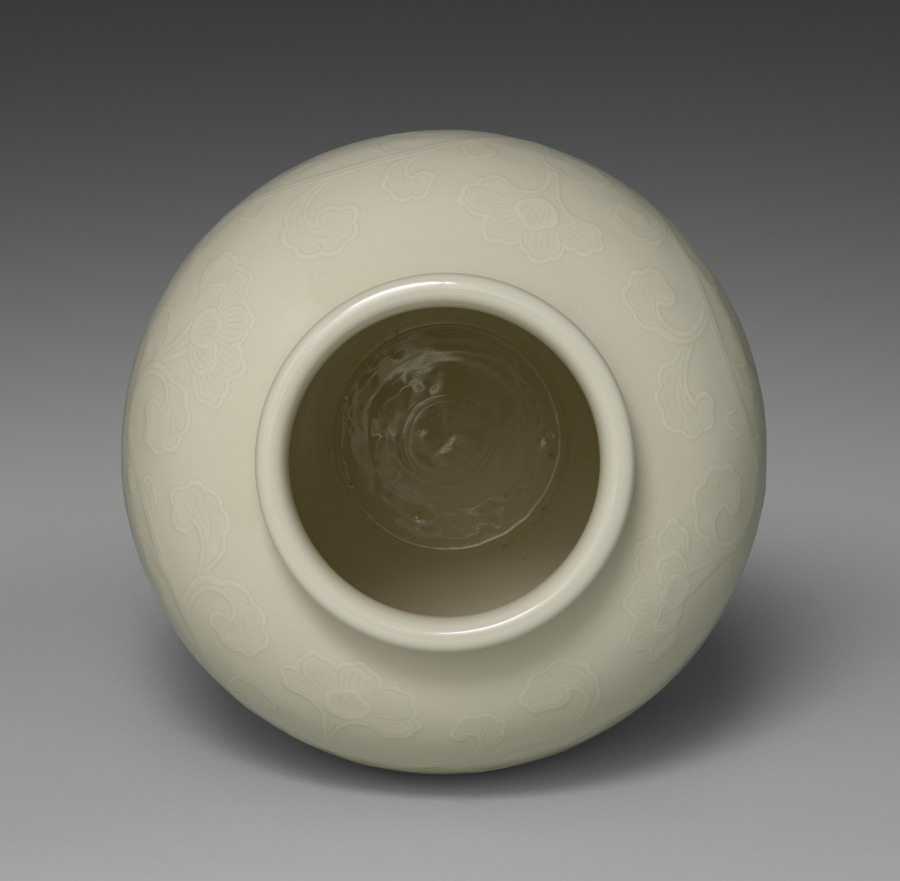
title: Guan-Shaped Vessel with Floral Scroll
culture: Japan, Taishō period (1912–26) or Shōwa period (1926–89)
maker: Seifū Yohei IV (Japanese, 1872–1951)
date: 1914–46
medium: Porcelain with molded and carved design and cream glaze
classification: Ceramic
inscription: 清風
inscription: 清風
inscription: 清風造之 【印】成山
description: Many of the vases created by Yohei III and IV were made with reference to and in emulation of Chinese ceramics in both form and glazing. The Seifu studio was inspired by later Chinese copies of two other archaic vessel types, the hu (Japanese ko) and guan (Japanese kan). In simple terms, in their original contexts, the hu and guan were storage jars that also appeared in ritual contexts. This hefty guan-shaped vase by Yohei IV has a floral scrolling pattern known in Japanese as karakusa, or “Chinese grasses.” The flowers are generally identified as lotus or peony. This flower vase might alternately be categorized as having the form of what is called a shukaiko in Japan, or a large vessel for holding wine. Shukaiko were created as early as the latter part of the Kamakura period after Yuan dynasty examples.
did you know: According to the box lid, the vase is a kanpakuji, "bright-jewel white porcelain," work.